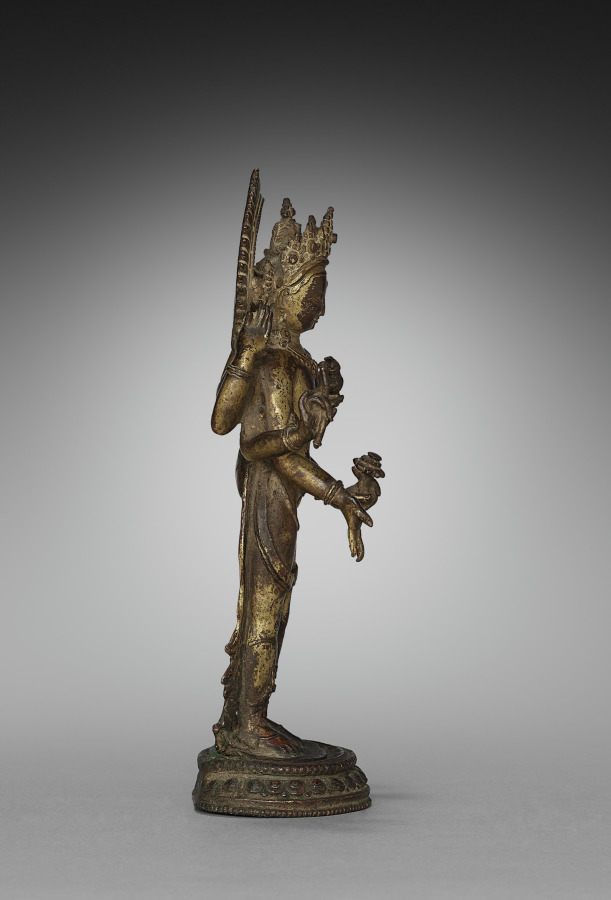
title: Lokeshvara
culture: Nepal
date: 1300s–1400s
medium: gilded copper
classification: Sculpture